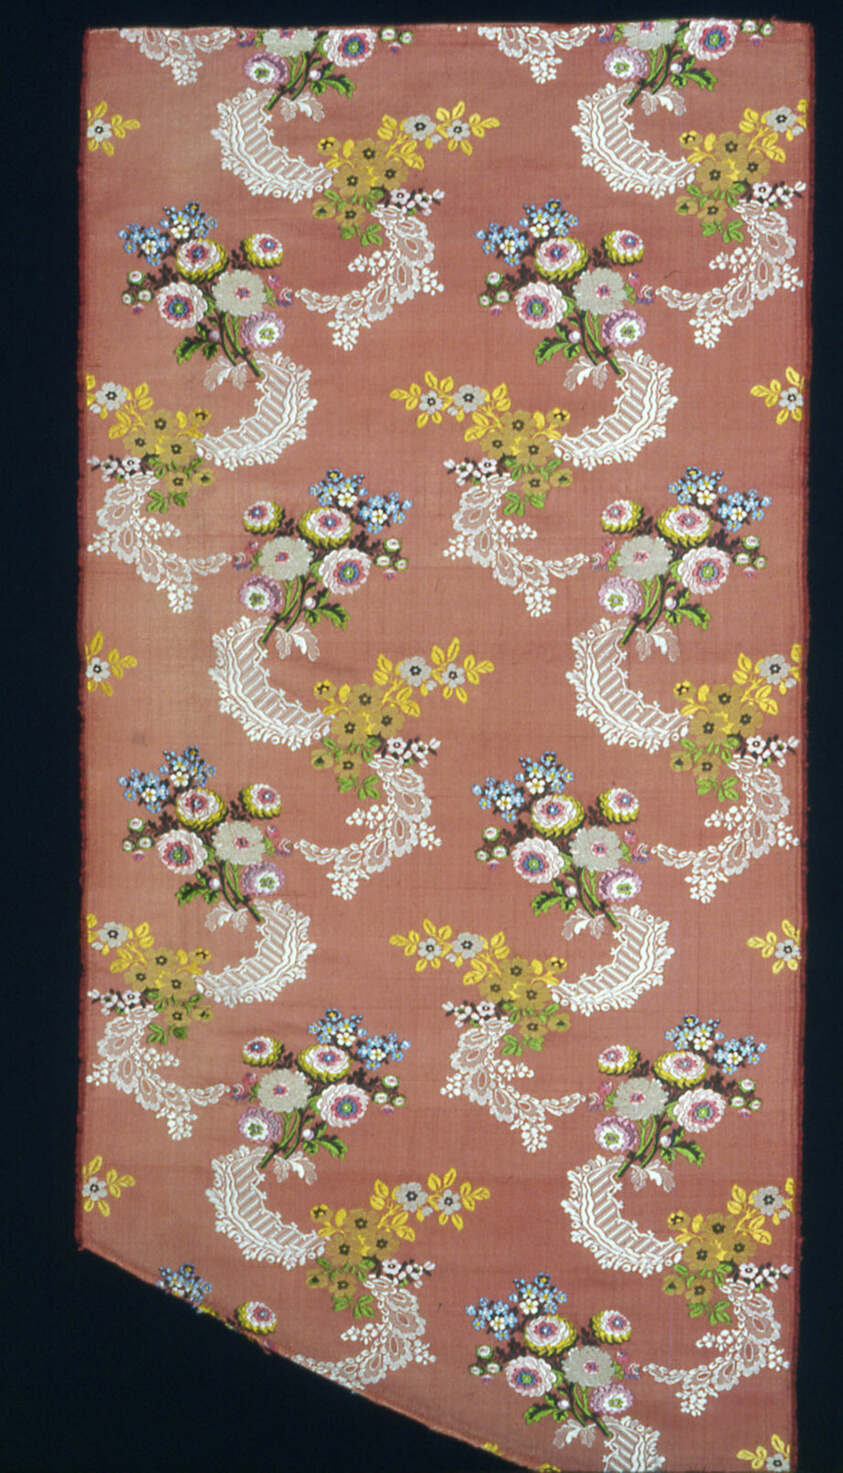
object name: Textile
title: Panel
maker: France, Lyon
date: 1750/75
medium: Silk, silk chenille, and bouclé yarns, plain weave with supplementary patterning warps and brocading wefts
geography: France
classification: textile; weaving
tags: flowers